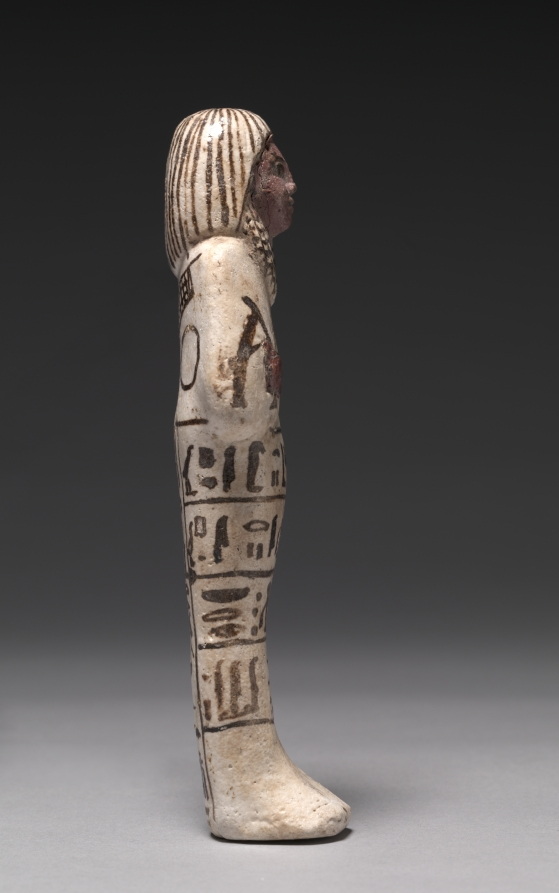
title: Shawabty of Djehutymose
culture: Egypt, New Kingdom (1540–1069 BCE), Dynasty 19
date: c. 1279–1213 BCE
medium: polychrome faience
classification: Funerary Equipment